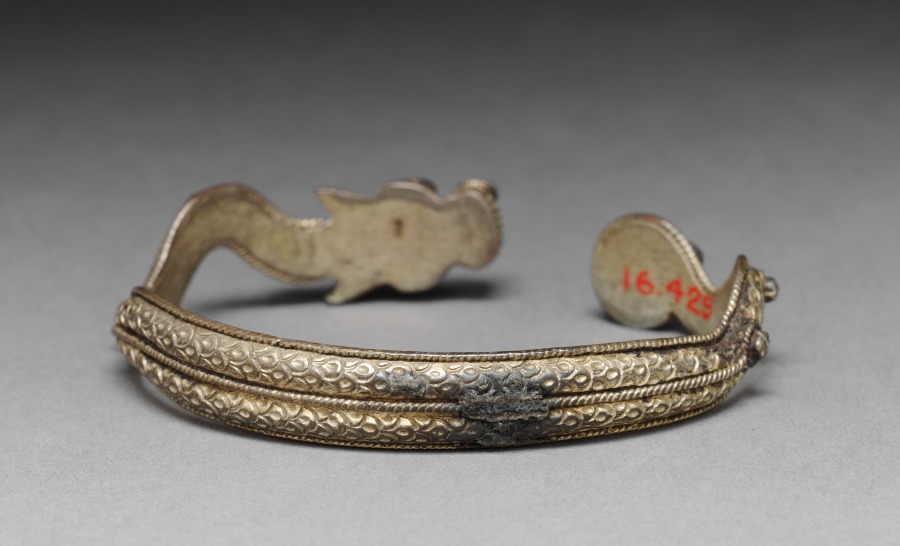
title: Bracelet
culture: Indo-Chinese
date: 1800s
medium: silver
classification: Jewelry